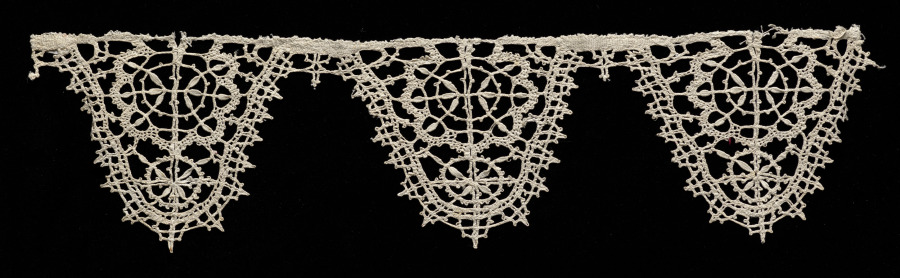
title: Lace Edging of Points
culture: Italy, Genoa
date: 1600s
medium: Bobbin lace (rose lace)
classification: Lace